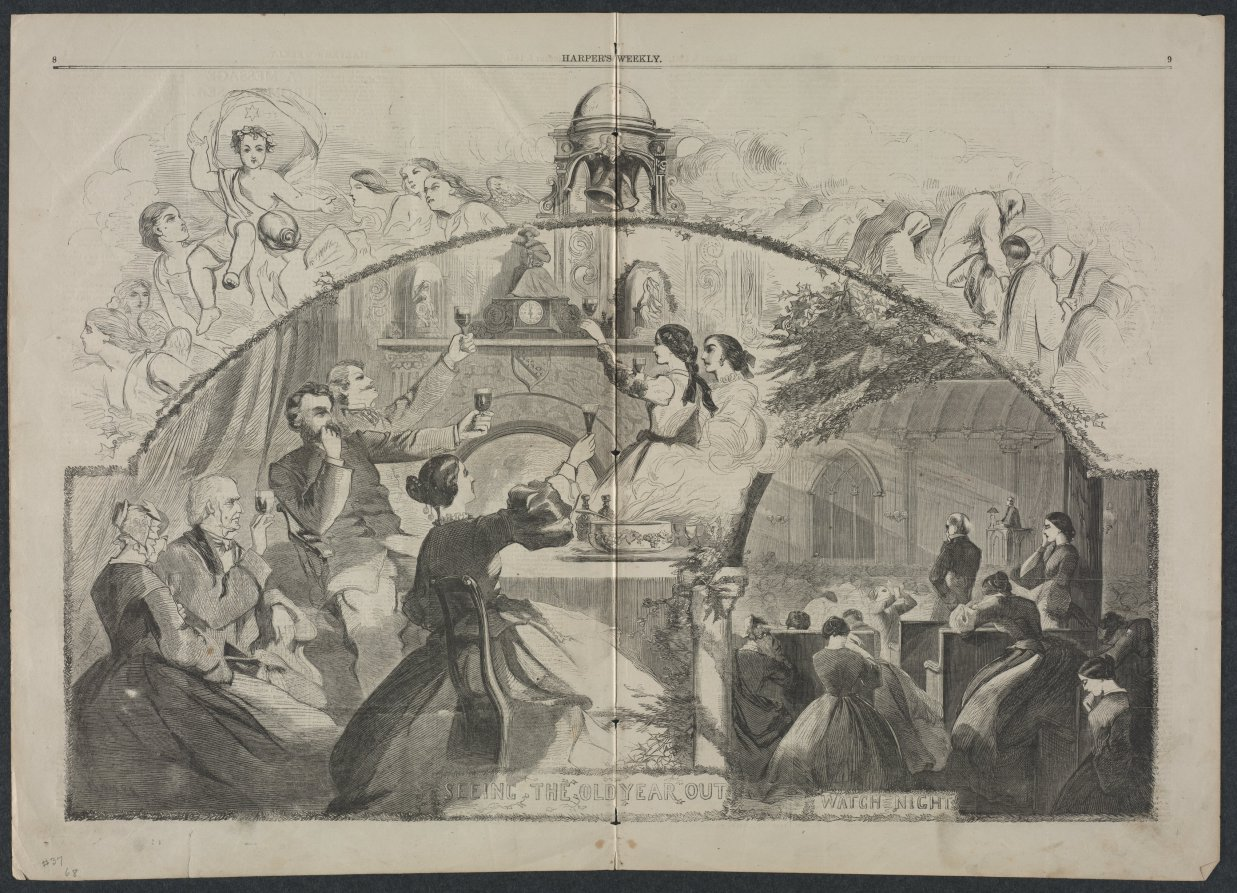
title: Seeing the Old Year Out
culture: America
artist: Winslow Homer (American, 1836–1910)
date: 1861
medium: wood engraving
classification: Print